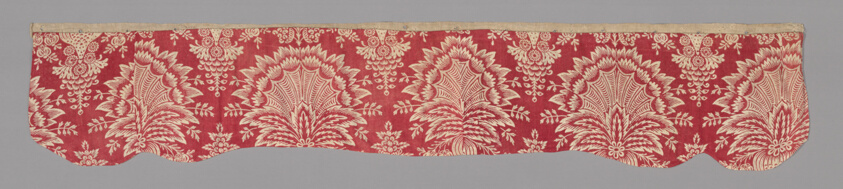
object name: Textile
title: Panel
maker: France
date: c. 1830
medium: Cotton, plain weave; block printed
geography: France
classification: textile; weaving - printed; printed textile